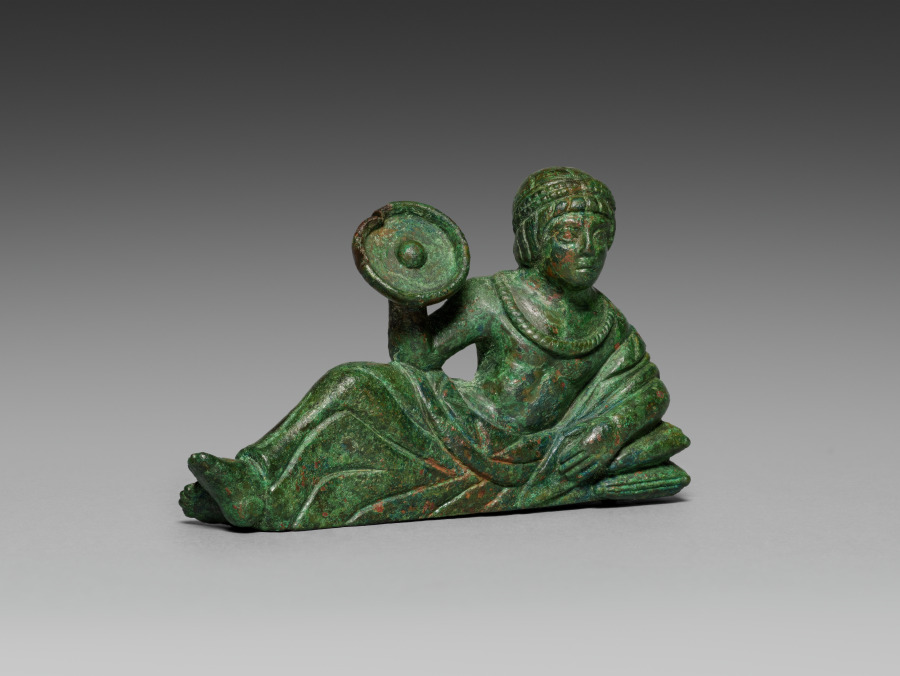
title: Vessel Ornament of Banqueter Holding an Omphalos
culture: Etruscan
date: probably 400–375 BCE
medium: bronze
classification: Sculpture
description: This bronze banqueter figurine was one of six once adorning the rim of a large basin, now lost. Cast in molds with individualized details, most have grooves on their underside to attach to the basin. Minute traces of gilding remain on areas of clothing and skin (mostly visible only under magnification), suggesting that they may have been completely gilded. Two handles in the form of hippocampi, horses with serpentine tails, also belonged to the basin and are now displayed at the Michael C. Carlos Museum at Emory University. The basin may have been used to hold liquid for a banquet, or was perhaps funerary. This bronze figurine holds a phiale mesomphalos, a shallow wine bowl, in his right hand. The vessel is tilted upward as if to spill its contents, perhaps as a libation for the gods. Traces of gilding remain in the corners of the phiale mesomphalos and the figurine’s drapery. His left hand rests against a fold of cloth slipping over his shoulder. A garland lies on his bare chest and another crowns his head. The banqueter shares many similarities with 1987.158.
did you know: Though primarily associated with dedicatory libations, the phiale mesomphalos could also be used for drinking.